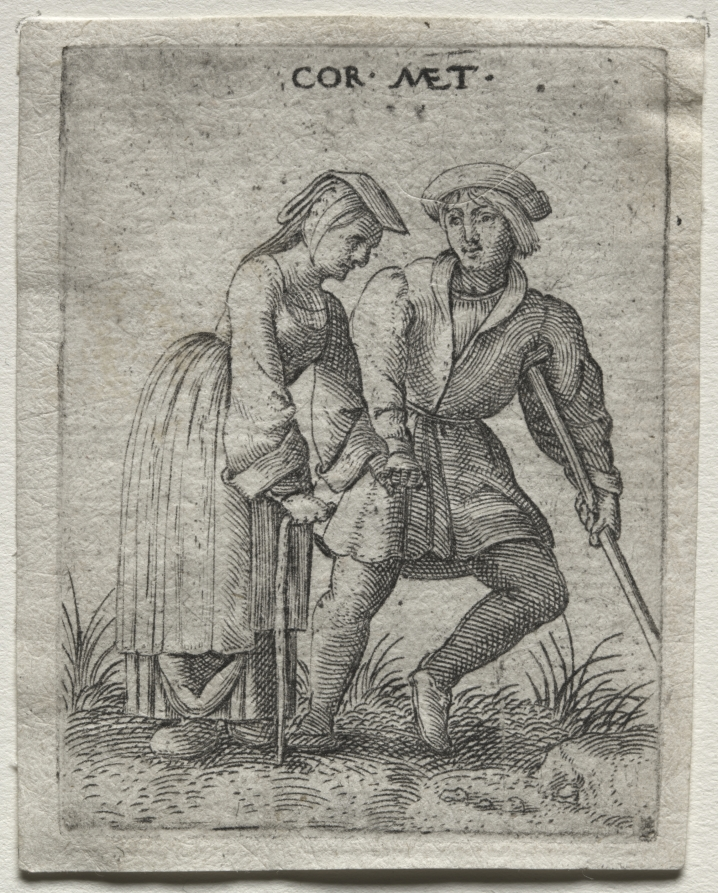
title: Dancing Cripples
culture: Flanders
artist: Cornelis Massys (Flemish, 1510/11–1556/57)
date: 1538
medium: engraving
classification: Print